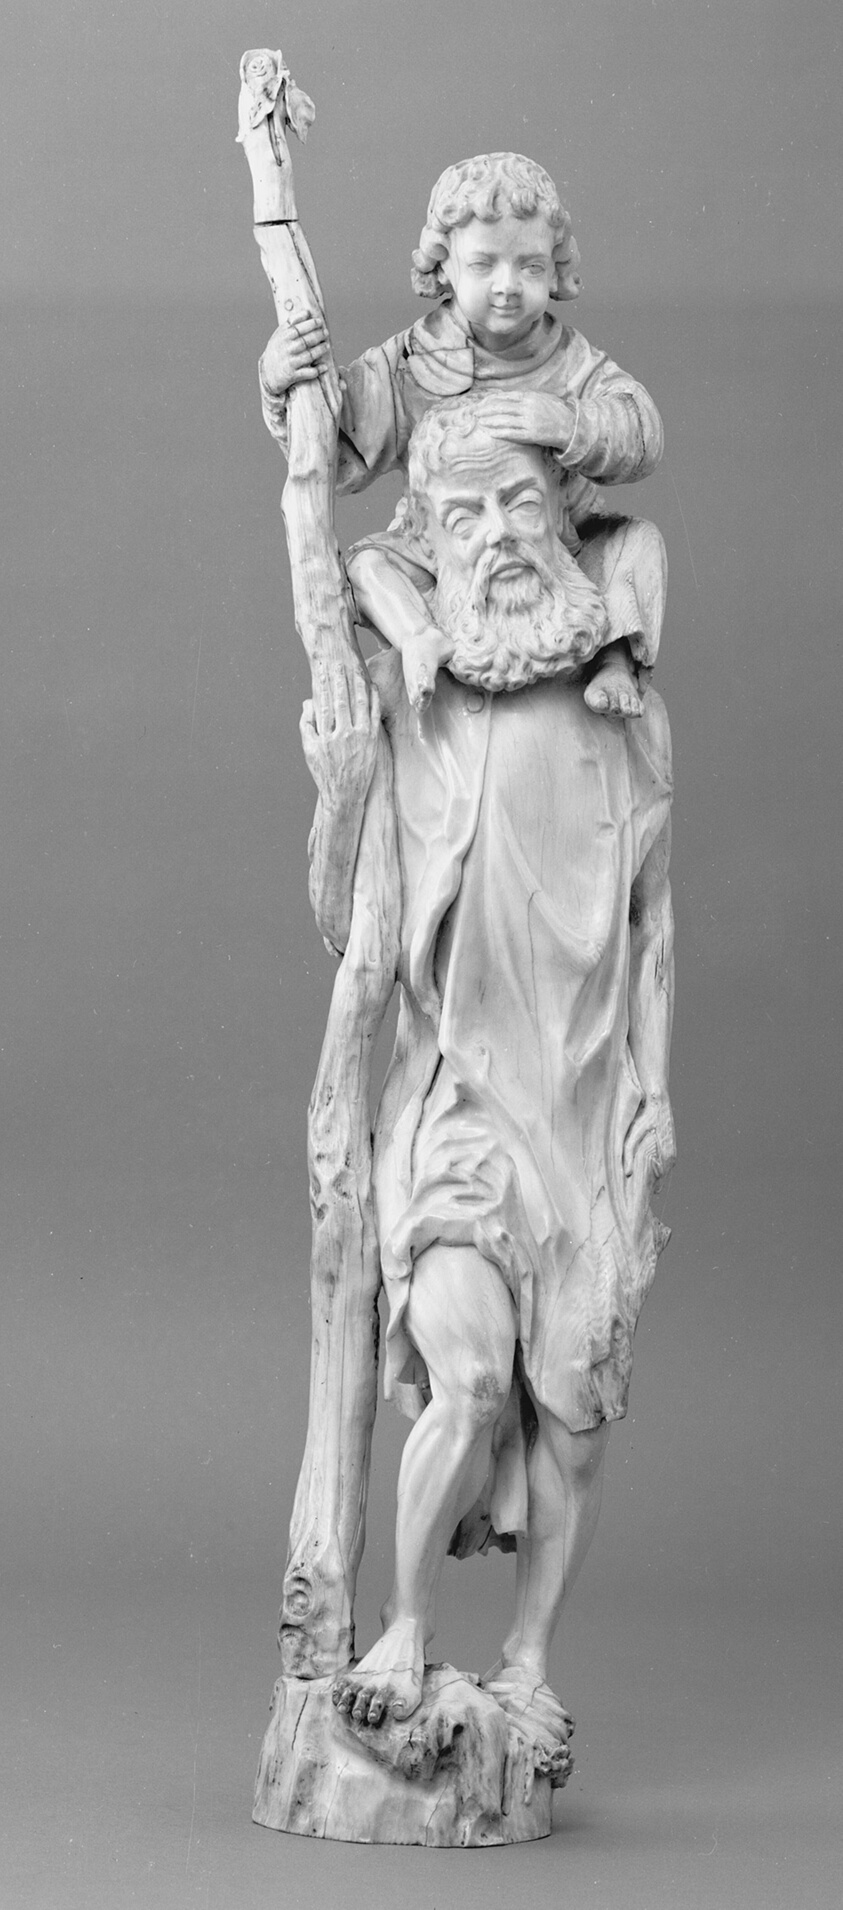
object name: Sculpture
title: Saint Christopher Supporting the Christ Child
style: 17th Century, 18th Century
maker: German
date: 1680/1700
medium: Ivory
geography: Germany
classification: statuette; sculpture; figure; religious; german; ivory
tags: saints, child, children, Christian subjects, Christianity, elderly, Jesus, man, religion, religious, religious figures, religious scenes, staffs